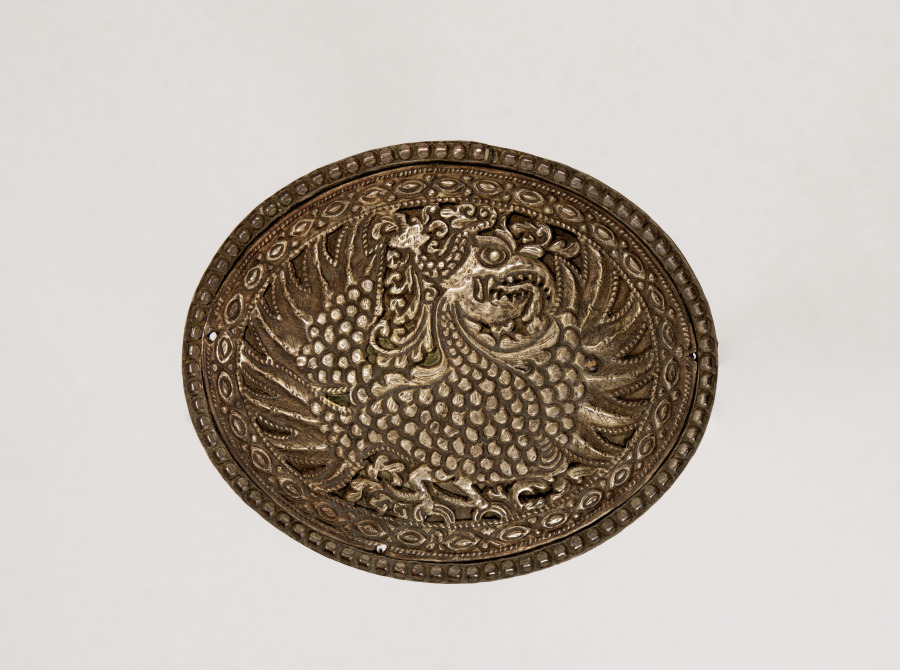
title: Sword Buckle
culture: Java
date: 1800s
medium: iron and silver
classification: Arms and Armor